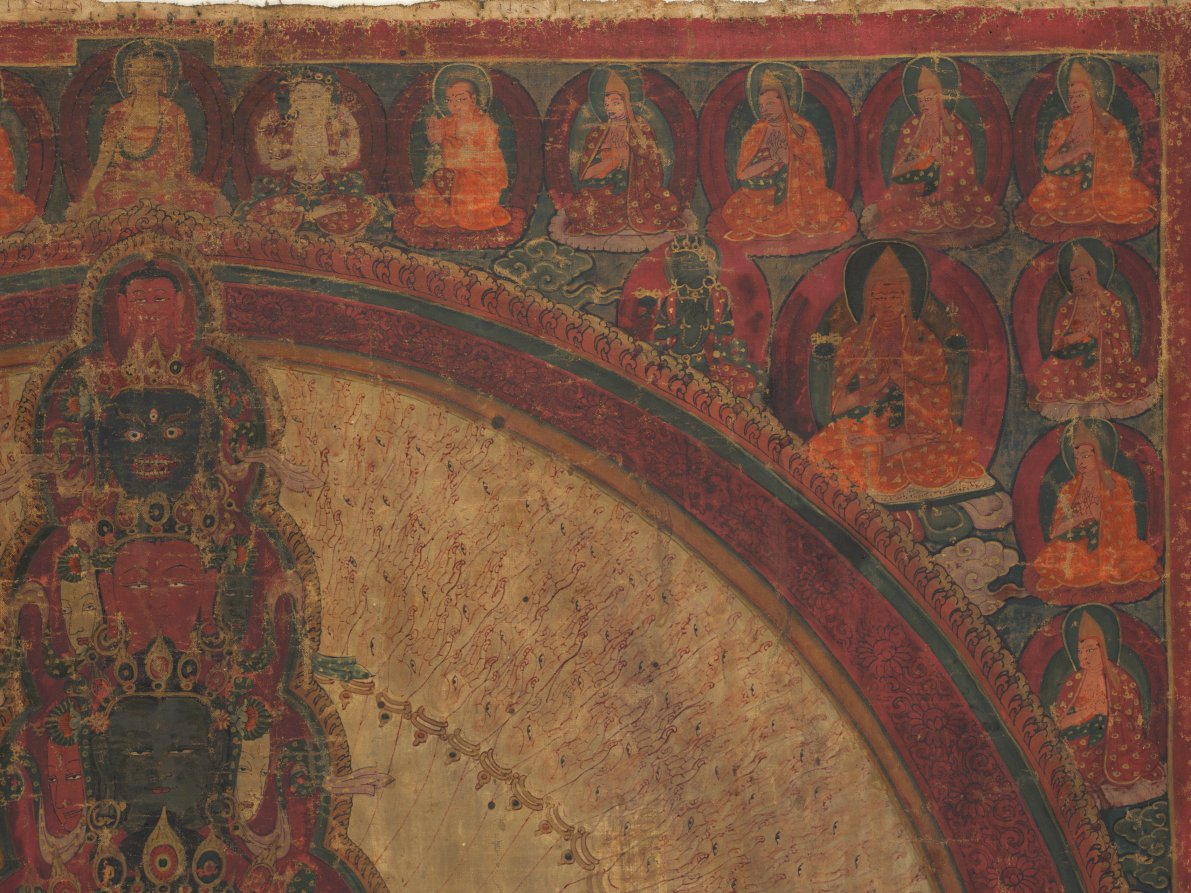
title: Eleven-Headed, Thousand-Armed Bodhisattva of Compassion (Avalokiteshvara)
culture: Western Tibet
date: c. 1500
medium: Gum tempera and ink on cotton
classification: Painting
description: One thousand arms surround the central figure like a radiating halo. Each hand has an eye in the palm to see the suffering of all beings, generating the sense of compassion that this figure embodies. The special form of the central image of the bodhisattva Avalokiteshvara derives from the mystic vision of a nun named Gelongma Palmo, who was born a Kashmiri princess, but prayed for leprosy to avoid having to marry and became an accomplished nun. While meditating in a cave, she achieved this vision of 11-headed, 1,000-armed Avalokiteshvara, who cured her leprosy and guided her on the path to enlightenment.